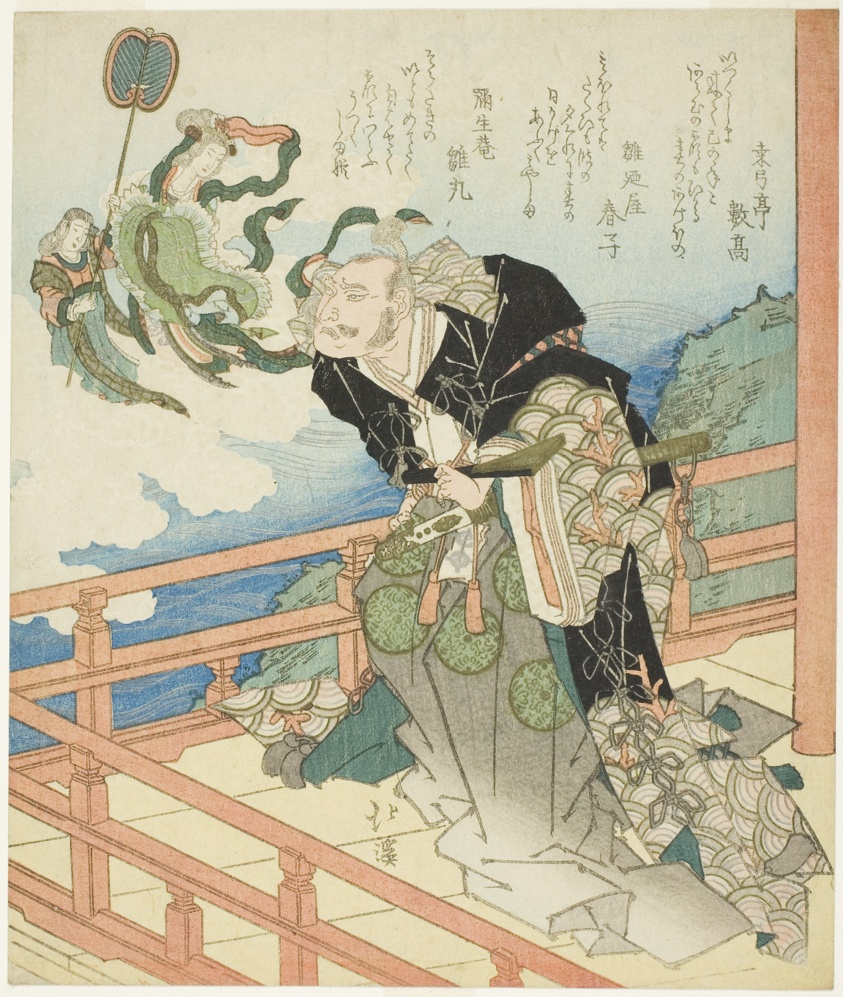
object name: Print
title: Benzaiten appearing to Taira no Kiyomori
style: Japanese (culture or style)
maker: Totoya Hokkei (Japanese, 1780-1850)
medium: Color woodblock print; shikishiban, surimono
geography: Japan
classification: woodblock print; print; asian art